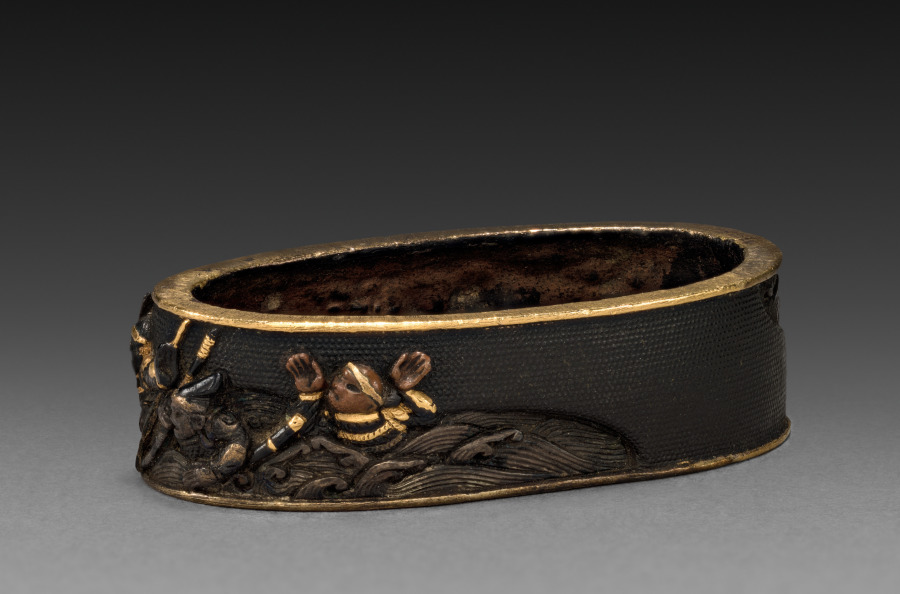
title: Sword-Hilt Collar (Fuchi)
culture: Japan, Edo period (1615–1868)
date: 1700–1850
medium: shakudo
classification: Arms and Armor